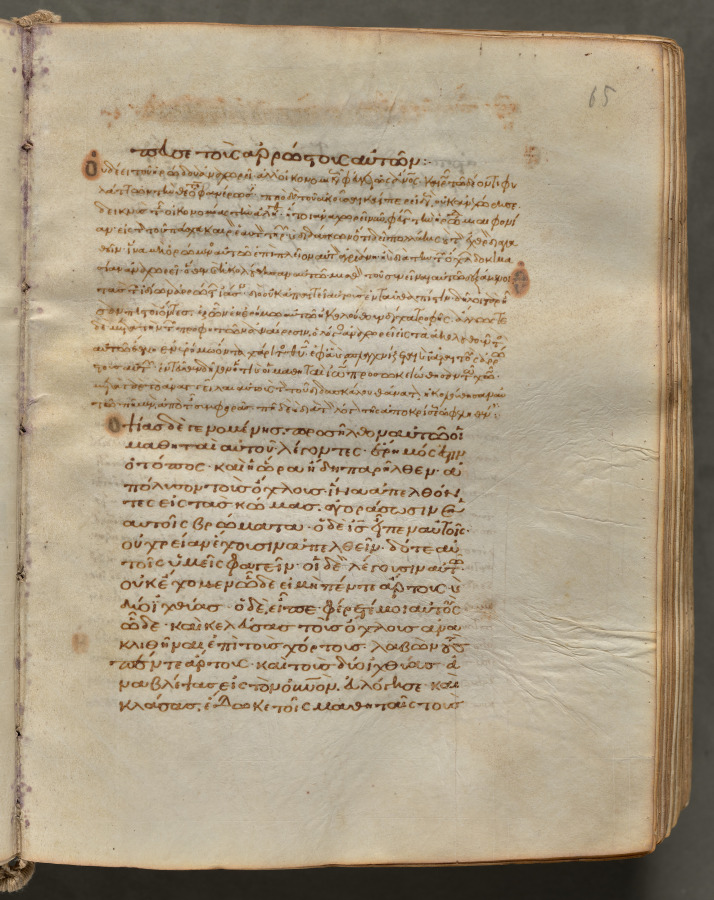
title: Text, folio 65 (recto), from a Gospel Book with Commentaries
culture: Byzantium, Constantinople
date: c. 1000–1100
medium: ink, tempera, and gold on vellum; leather binding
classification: Bound Volume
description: Each of the four gospels in this book opens on a page with brilliantly illuminated borders depicting the author of the text as well as birds-principally peacocks, symbols of the immortality of the soul-and fountains, representing the fountain of life and the salvation of the soul. This volume consists of 428 leaves with texts in Greek. Its level of sophistication suggests that it was probably written and decorated in a monastery in Constantinople.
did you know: Gospel Books were carried in procession through Byzantine churches.